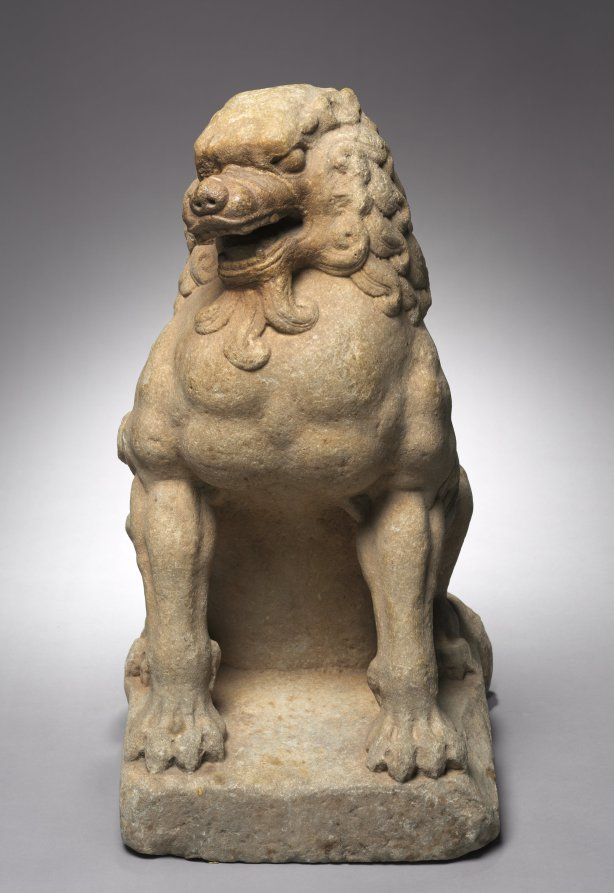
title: Guardian Lion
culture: China, Tang dynasty (618-907)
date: c. 600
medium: white marble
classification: Sculpture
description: Lion sculptures like this example are often found at the entrance to Buddhist temples in China. It may seem as if they are there to protect the temple. Lions also have had strong associations with Buddhism since the religion’s origin; the dharma, or Buddhist doctrine, is said to be spread through his roar.